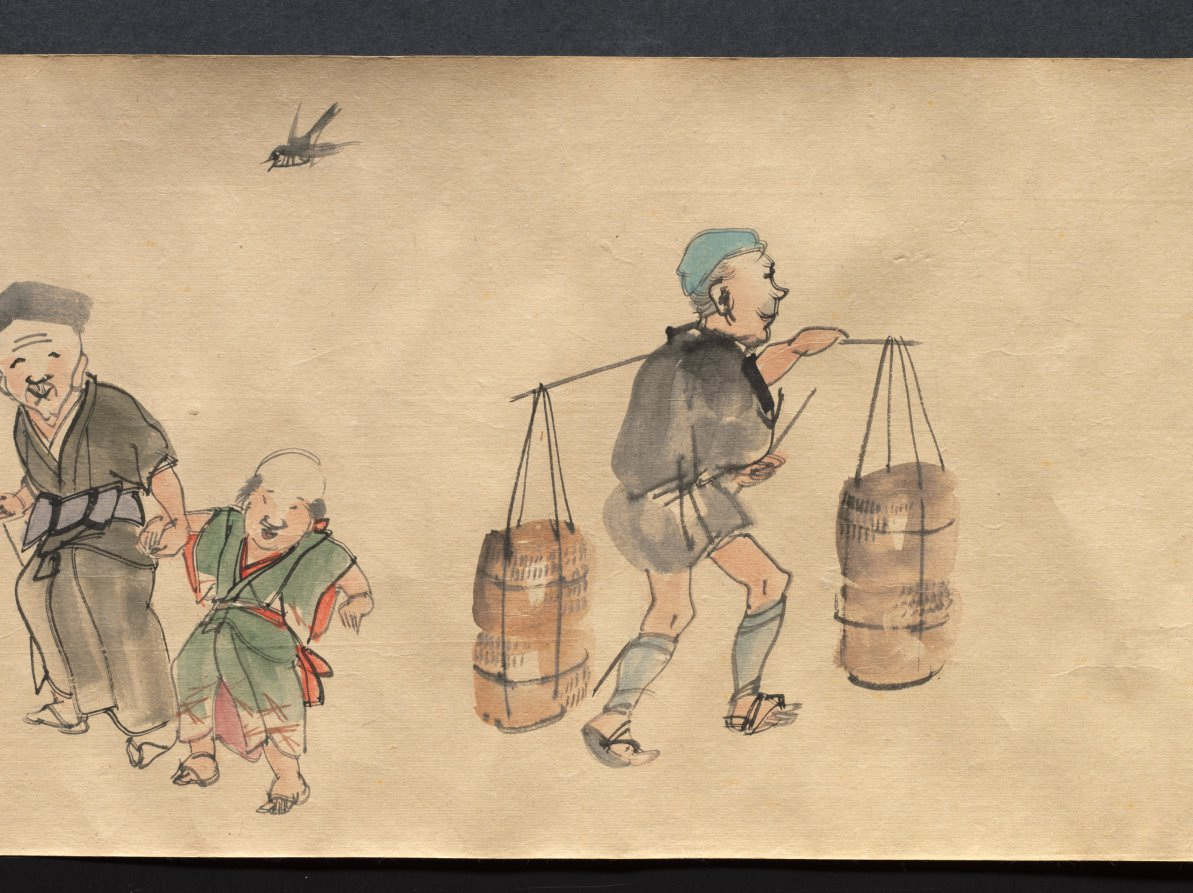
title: Festival Scenes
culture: Japan, Edo period (1615–1868)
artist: Suzuki Nanrei (Japanese, 1775–1844)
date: c. 1795–1844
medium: handscroll; ink and color on paper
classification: Painting